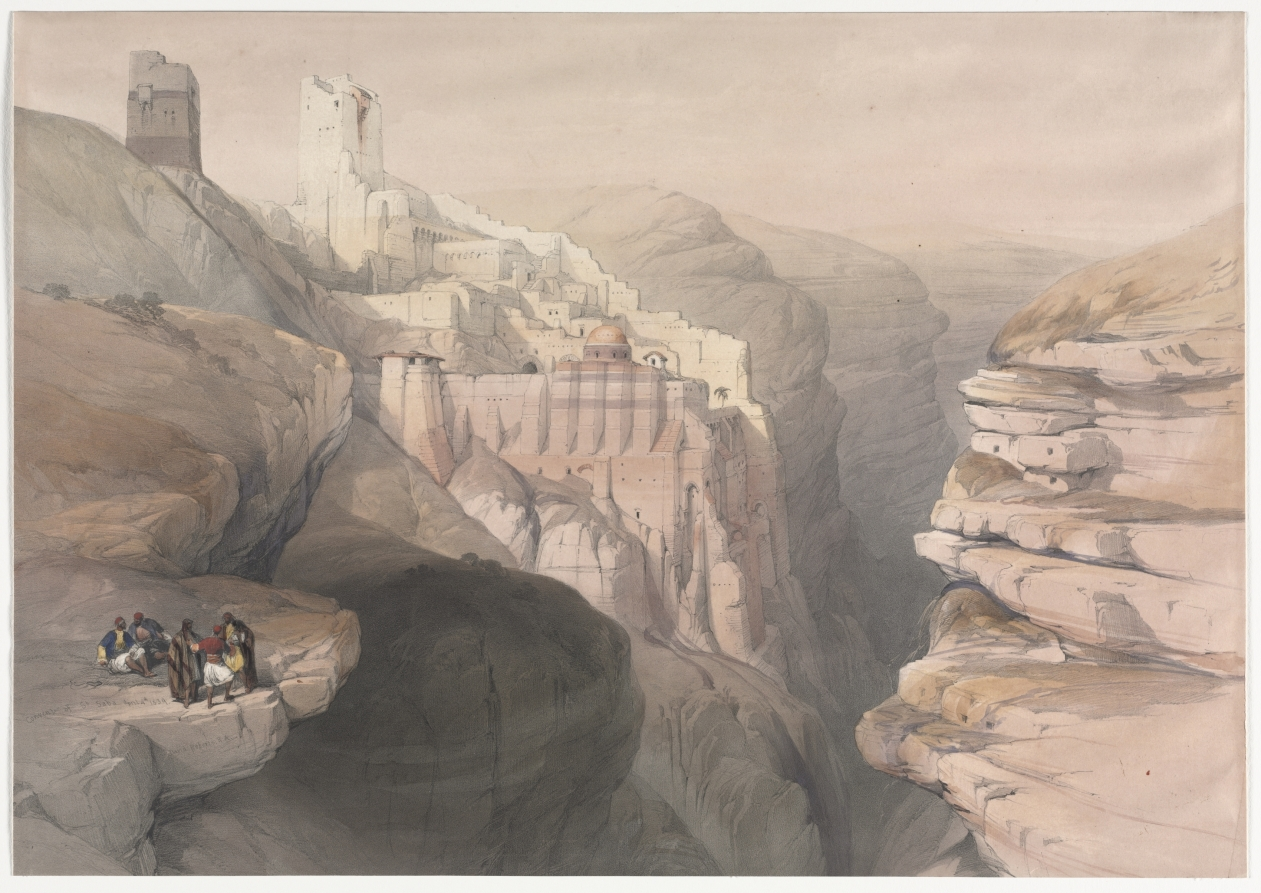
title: Convent of St. Saba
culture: England, 19th century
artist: David Roberts (Scottish, 1796–1864)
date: 1839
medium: color lithograph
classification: Print